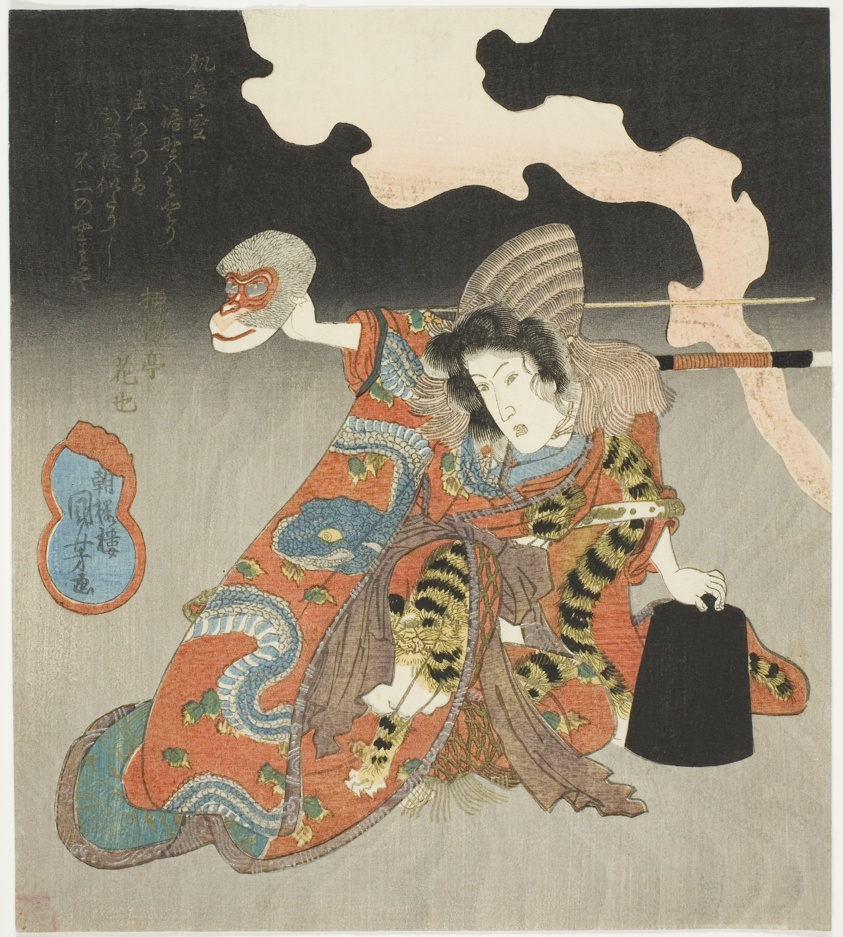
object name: Print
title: The actor Iwai Hanshiro VI in a female role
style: Japanese (culture or style)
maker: Utagawa Kuniyoshi (Japanese, 1787-1861)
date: c. 1830s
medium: Color woodblock print; left sheet of shikishiban diptych, surimono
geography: Japan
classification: woodblock print; print; asian art